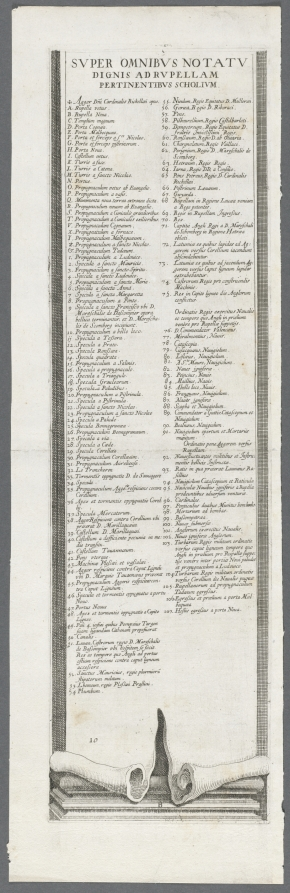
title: The Siege of La Rochelle: Plate 13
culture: France, 17th century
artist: assistant of Jacques Callot (French, 1592–1635)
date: 1628–1630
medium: engraving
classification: Print